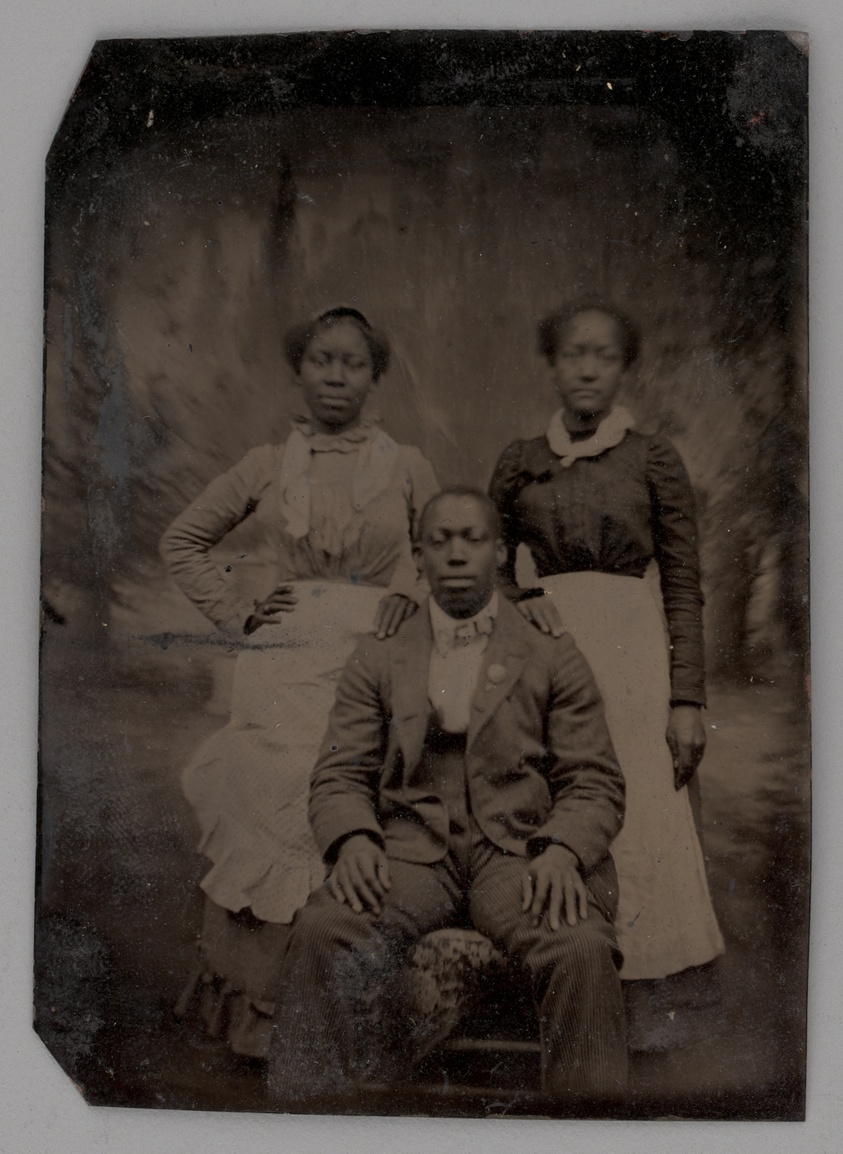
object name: Photograph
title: Untitled (Portrait of Two Standing Women and One Seated Man)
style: 19th century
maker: Unknown maker; American, 19th century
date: 1880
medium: Tintype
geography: United States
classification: portrait; tintype; photograph; photographic process; photography; portrait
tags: portraits: African American subject, portrait, portraits: multiple subjects, lundberg collection, African American, portraits